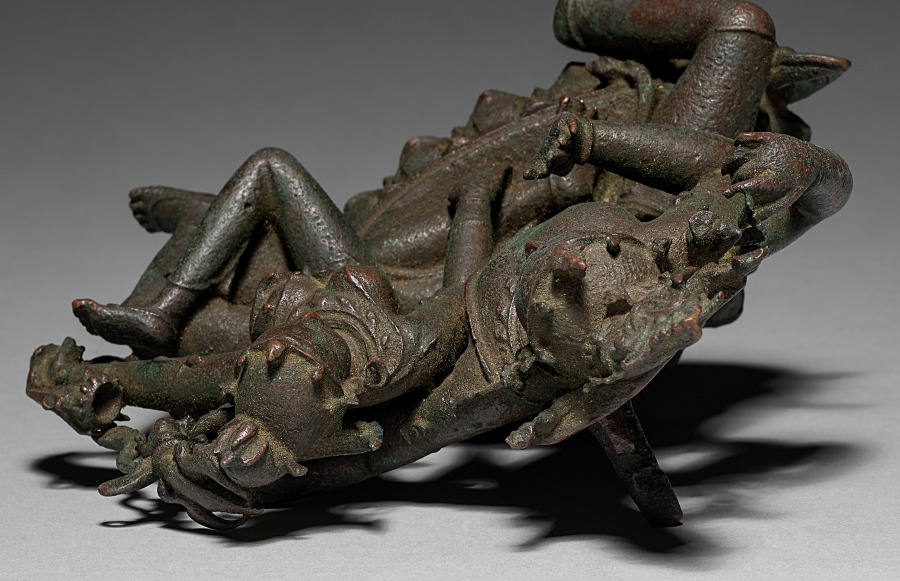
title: Shiva and Parvati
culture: East India, Bengal, Pala period, 9th Century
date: 800s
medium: bronze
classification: Sculpture